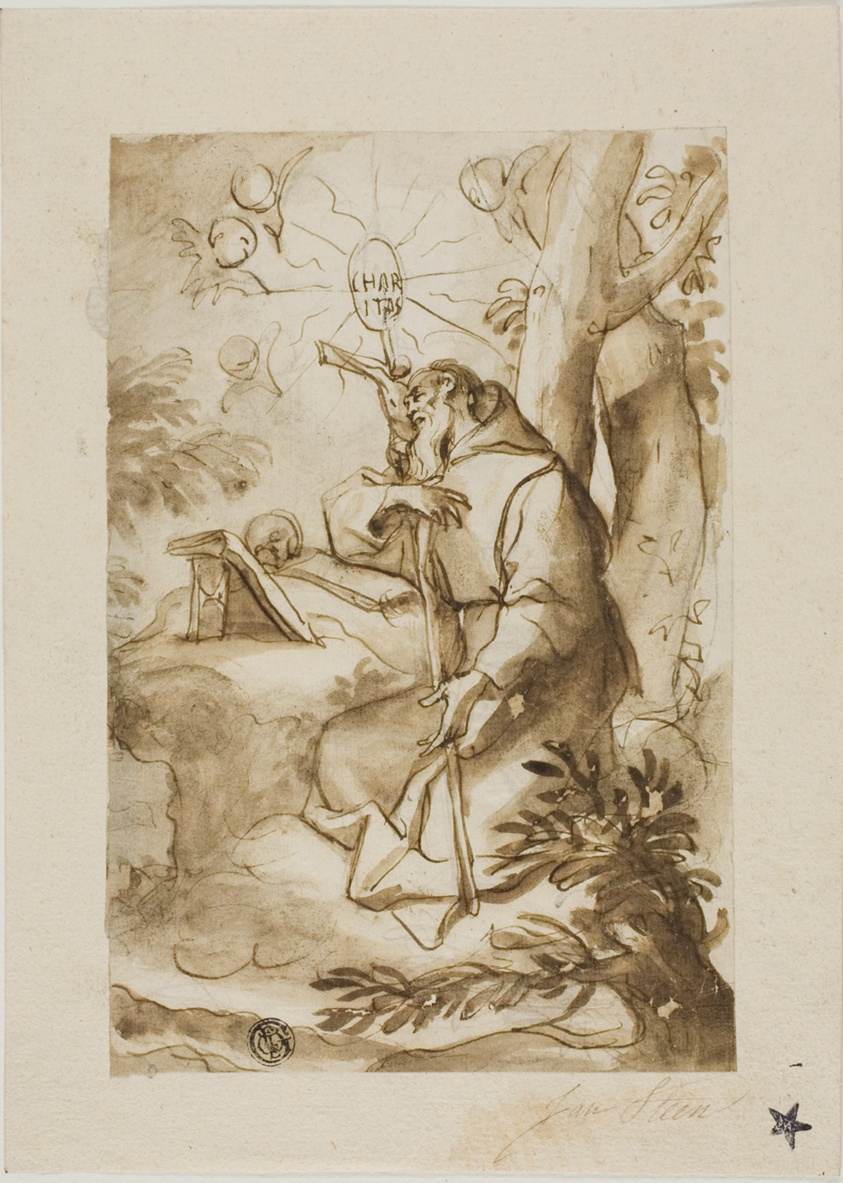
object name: Drawing and Watercolor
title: Saint Jerome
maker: Domenico Piola (Italian, 1627-1703); or Jan Steen (Dutch, 1626-1679)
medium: Pen and brown ink, with brush and brown wash, over black chalk on ivory laid paper, laid down on cream wove paper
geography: Italy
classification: ink or chalk wash; drawings (visual works); prints and drawing